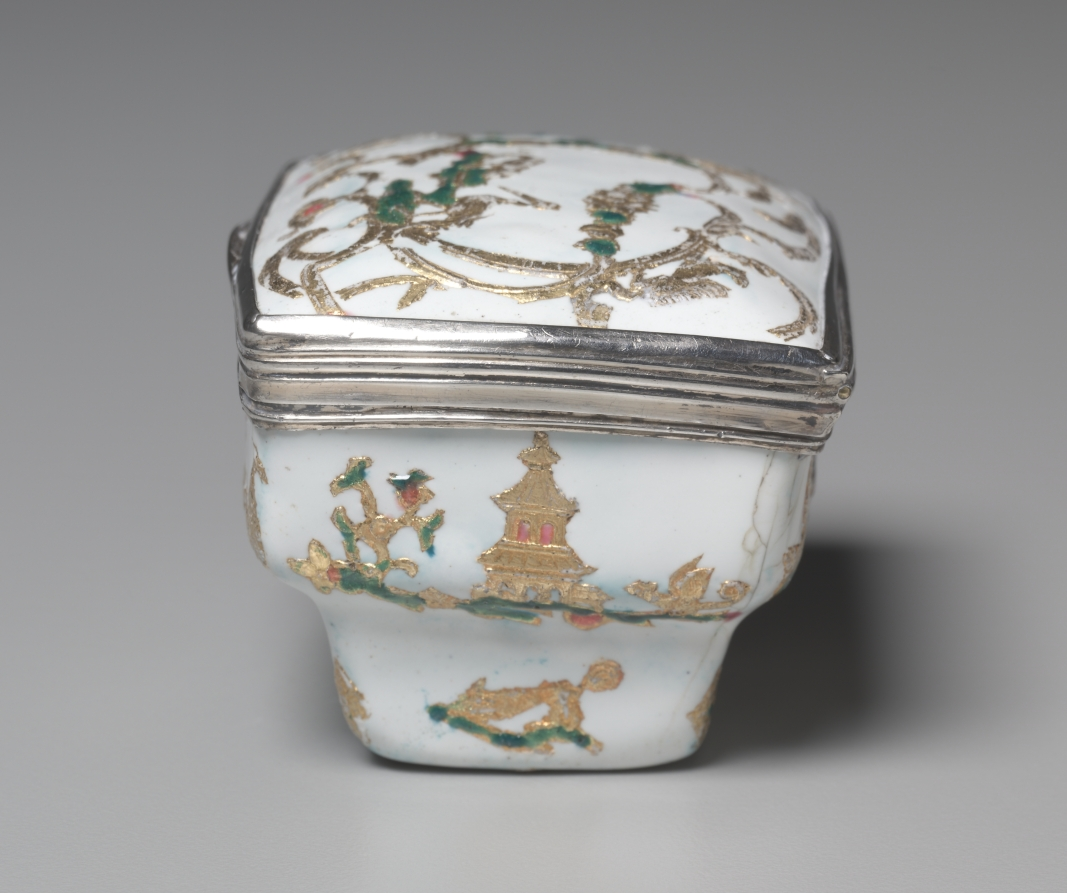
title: Box (Boîte)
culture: possibly France, mid-18th century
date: 1730–40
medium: enamel and gold leaf on copper mounted in silver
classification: Miscellaneous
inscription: [Traces of marks on mounts, too rubbed to be legible. One has previously been identified as possibly a French discharge mark of middle-18th century (Beuque 669 or 687). Maybe the discharge mark for small work of Hubert Louvet, Paris, 1732-38, left side of rim.]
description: Chinoiserie in 18th-century France incorporated imitations of East Asian motifs, designs, and ornaments into European art. These imitations were often distorted by the European imagination and were not accurate representations of the cultures from which they drew inspiration. Motifs typical of chinoiserie can be seen in this box’s floral patterns and repeated representations of pagodas, dragons, and peacocks.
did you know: The depictions of various animals and plants on this box have been covered in a very thin layer of gold called gold leaf.